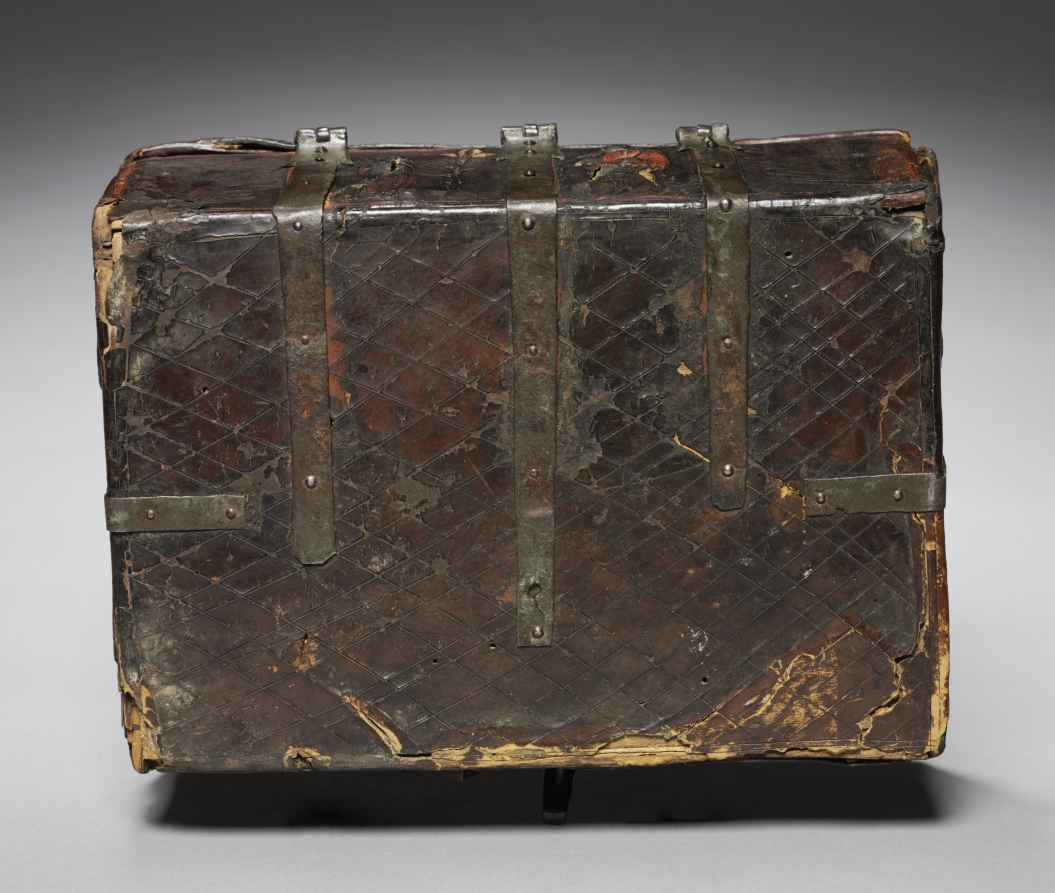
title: Leather Casket with Scenes of Courtly Love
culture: France, Gothic period, 2nd half of the 14th century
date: c. 1350–1400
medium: Leather: embossed, incised; iron mounts; wood core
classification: Leather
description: During the Middle Ages, small boxes like this were produced for the secular market. Used for storing personal items, the boxes typically consisted of a wood core that might be decoratively painted and gilded or covered with another material, such as ivory or leather. Manufactured in small, highly specialized leather workshops, these richly embellished caskets were valued furnishings in the homes of the aristocratic clientele that commissioned them. On the lid of this box, a couple is shown with banderoles inscribed in Old French with expressions of mutual love. "Hold my heart," requests the lady. "But you already have it," replies the man. On the front of the casket, the man, holding a heart, appears again and states, "Have it once more."